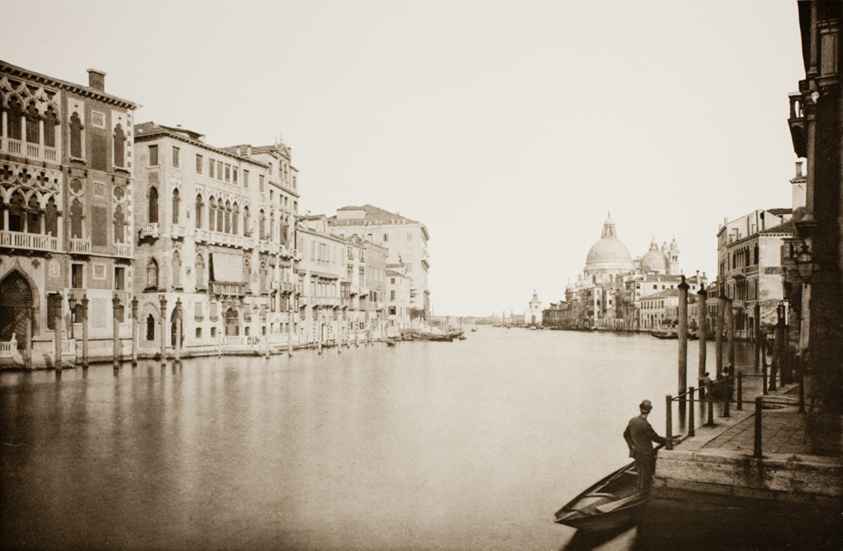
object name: Photograph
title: Untitled (67)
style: 19th century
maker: edited by Ferdinando Ongania; Italian, 1842–1911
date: c. 1890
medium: Photogravure, No. 67 from the portfolio "Calli, Canali e Isole della Laguna"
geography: Italy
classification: photograph; photography